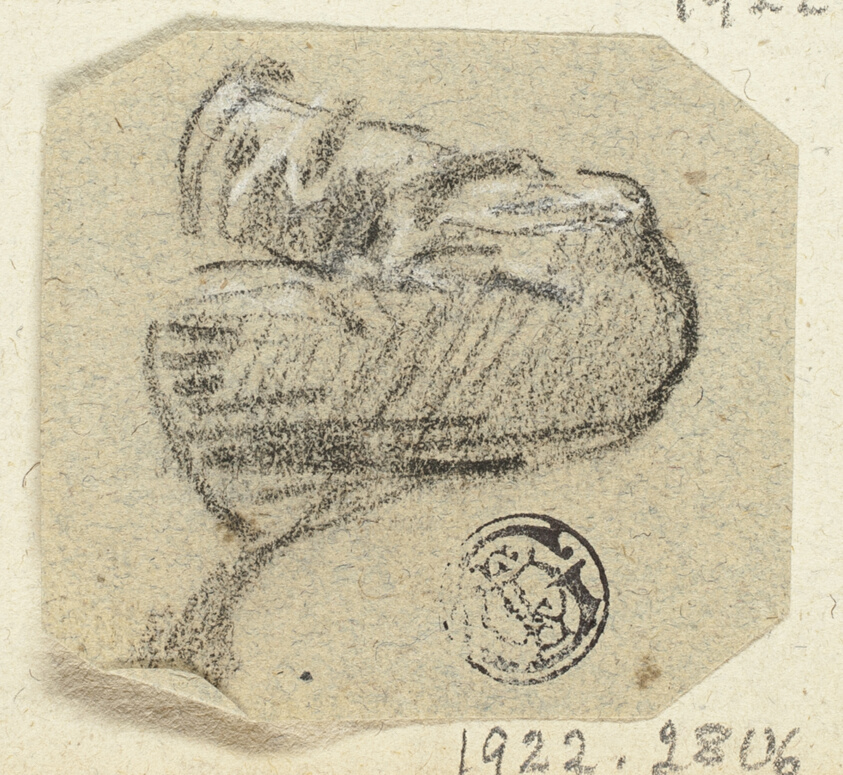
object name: Drawing and Watercolor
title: Sleeve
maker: Unknown Artist; British, 19th century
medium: Black chalk, heightened with touches of white chalk, on gray laid paper with blue fibers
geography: United Kingdom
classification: chalk; drawings (visual works); prints and drawing; paper